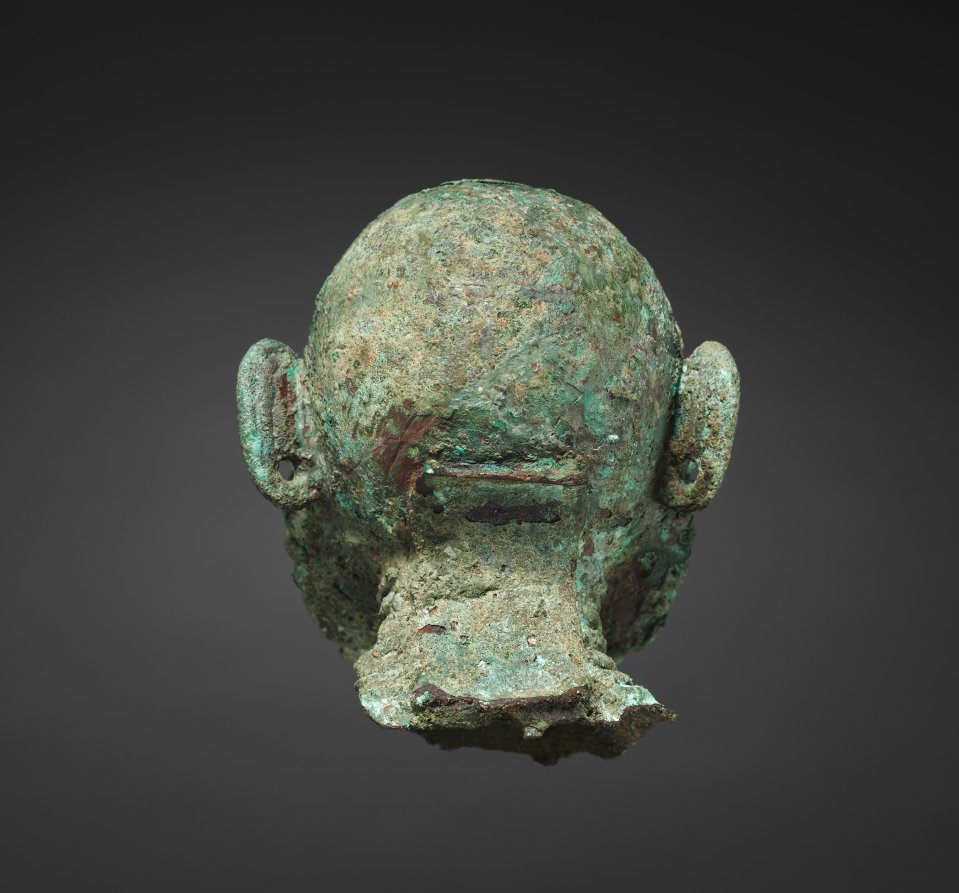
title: Male Head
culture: South East Asia, Thailand, Ban Chiang, Neolithic period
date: c. 1000 BCE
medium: bronze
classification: Sculpture